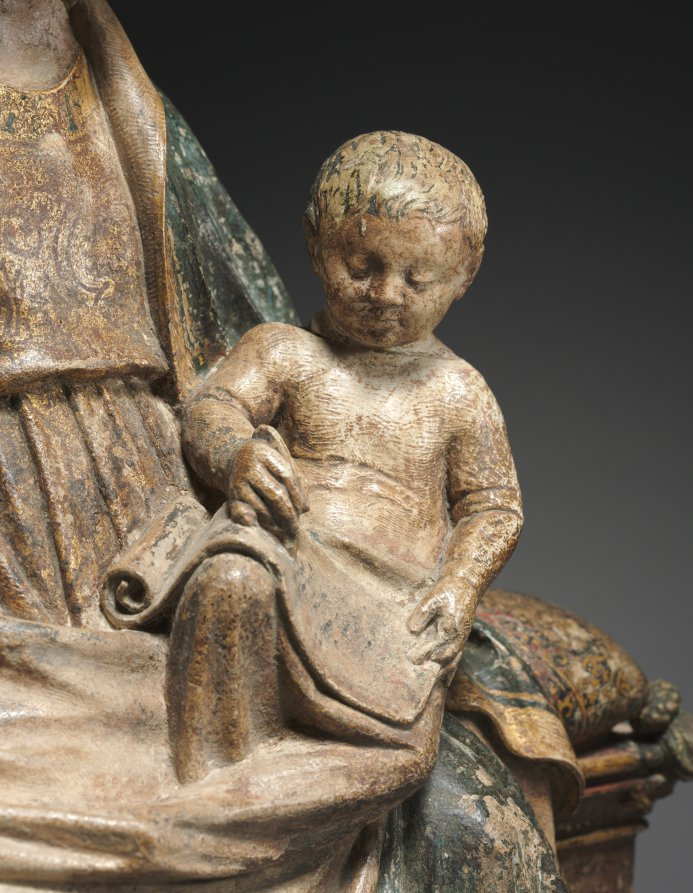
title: Enthroned Virgin with the Writing Christ Child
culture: Franco-Netherlandish, active Paris(?), 15th century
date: c. 1400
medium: limestone with polychromy and gilding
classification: Sculpture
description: This sculpture belongs to a tradition of seated Virgins that were prominent in Netherlandish art in the decades around 1400, and by extension may be associated with the Valois courts at Paris, Dijon, and Bourges. The theme of the Christ child who writes into an open book or onto a vellum banderole emerged during the third quarter of the 14th century and had great appeal among ecclesiastical and aristocratic clients. It undoubtedly refers to the educating and nurturing role of the mother in teaching the child, but also to the future position of the adult Christ as author and teacher. The small scale of this sculpture and the fact that its back is uncarved suggest that it was made for a small alcove or niche, appropriate in the intimate setting of a small chapel or oratory. The sculpture would have primarily been viewed from the front and perhaps from slightly below.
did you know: Here the Virgin is sitting on a highly decorated pillow.